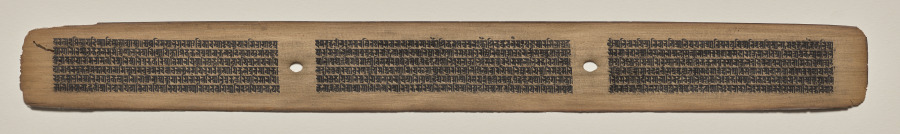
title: Text, Folio 29 (recto), from a Manuscript of the Perfection of Wisdom in Eight Thousand Lines (Ashtasahasrika Prajnaparamita-sutra)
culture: Eastern India, Bihar, Vikramashila Monastery. Painting: Nepal, Kathmandu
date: Sunday, September 14, 1119 (year 239 of the Newar Samvat in the month of Ashvina)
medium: gum tempera and ink on palm leaves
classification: Painting